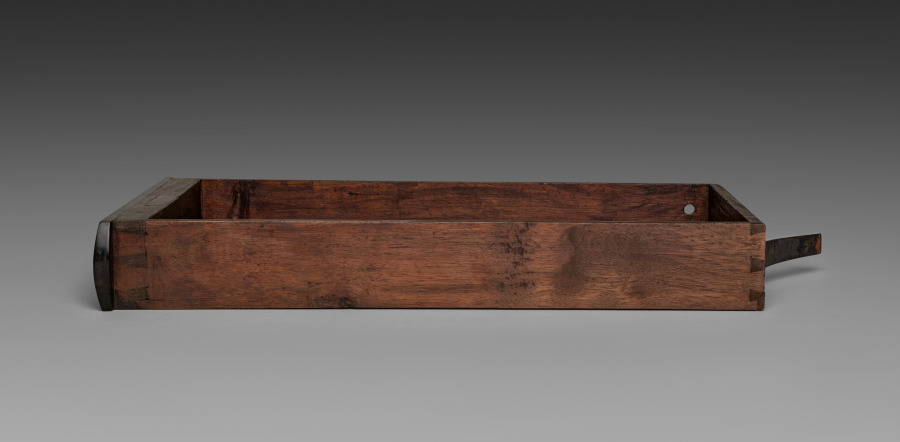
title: Drawer for Cabinet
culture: France, late 17th Century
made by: André-Charles Boulle (French, 1642–1732)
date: c. 1690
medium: ebony, marquetry in metal and tortoiseshell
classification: Furniture and woodwork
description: Appointed cabinetmaker to King Louis XIV in 1672, André-Charles Boulle became a master of furniture making in France during the late 1600s until his death in 1732. Known primarily for his use of marquetry, in which metal patterns are inlaid into tortoiseshell then applied within the veneered surface of the furniture, Boulle established a level of quality and craftsmanship few others could achieve. As a result, his work found favor at the royal court and among other aristocrats and diplomats eager to impress the king. The inclusion of a medallion depicting Louis XIV within the bronze decoration of this chest would have identified the owner with the royal court. Often exhibiting stout architectural proportions with elegant groups of inlaid motifs such as the parrot on the central panel of this chest, Boulle’s designs are an example of the intellectual fashion for contrasting ideas, materials, and motifs.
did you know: Originally designed to sit atop an elaborate tall stand, this chest was likely altered in the late 1700s to reduce its scale and height.